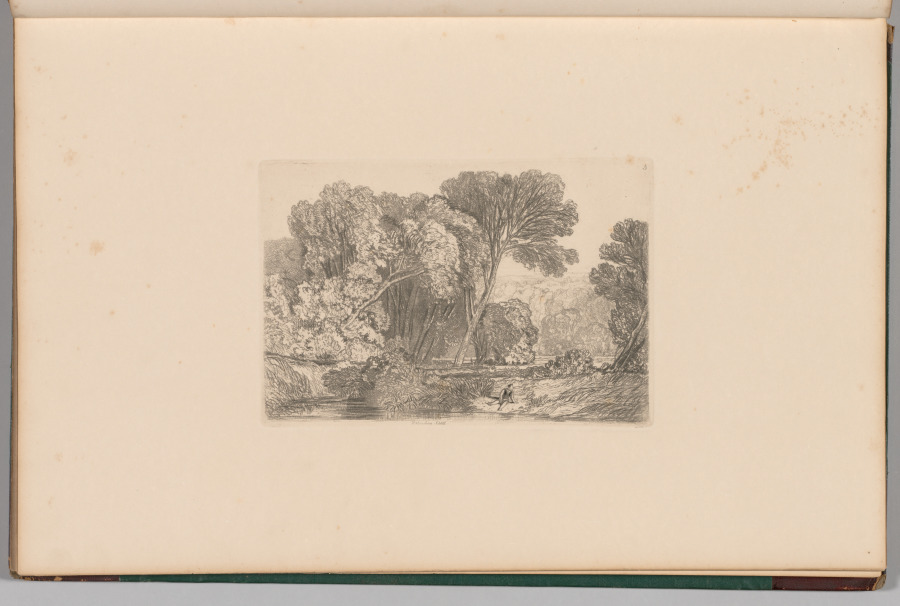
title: Liber Studiorum: Plate 5, Walsingham, Norfolk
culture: England, 19th century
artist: John Sell Cotman (British, 1782–1842)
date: 1838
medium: softground etching, from a bound volume containing 48 plates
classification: Bound Volume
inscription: In plate, within image, upper right: 5; in plate, below image: Walsingham, Norfolk